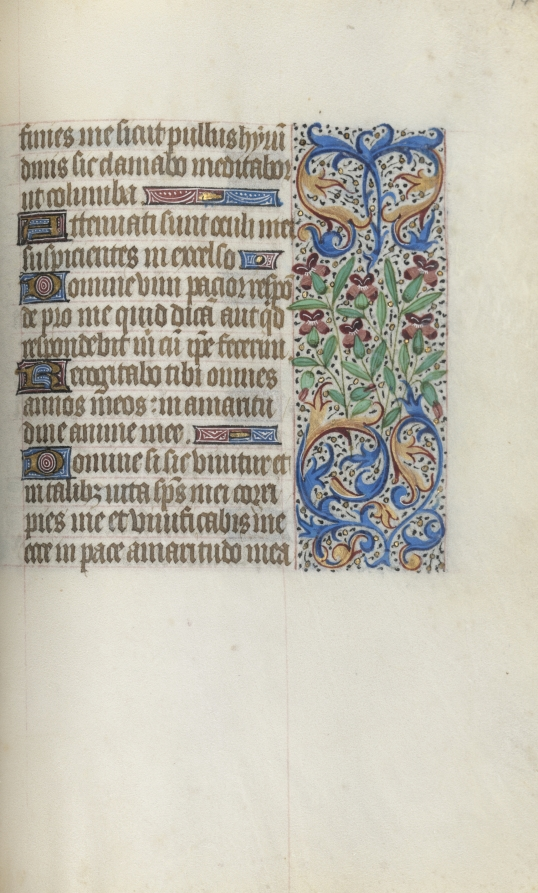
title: Book of Hours (Use of Rouen): fol. 140r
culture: France, Rouen, 15th century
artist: Master of the Geneva Latini (French, active Rouen, 1460–80)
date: c. 1470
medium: ink, tempera, and gold on vellum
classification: Bound Volume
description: In the late 1400s and early 1500s Rouen was an established and important center of book production. The city’s cathedral had a wealthy chapter that spent large sums of money to commission books and to maintain its extensive library. The stationers and booksellers would have likely been concentrated in or near the cathedral precinct. This artist, named after a manuscript now in Geneva, was Rouen’s principal illuminator during the second half of the 1400s.